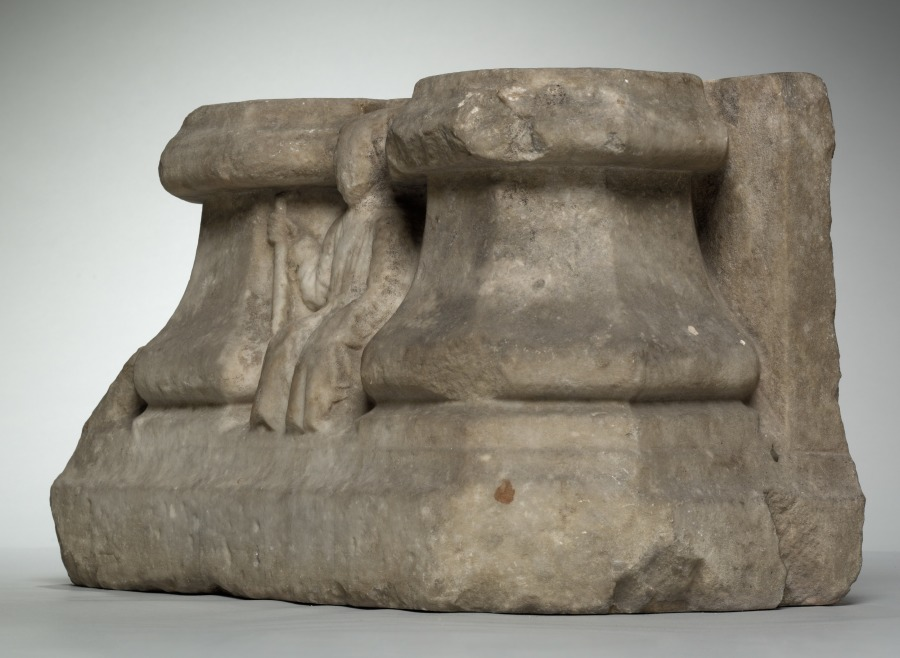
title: Double Column Base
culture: France, late 15th century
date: late 1400s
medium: marble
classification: Sculpture